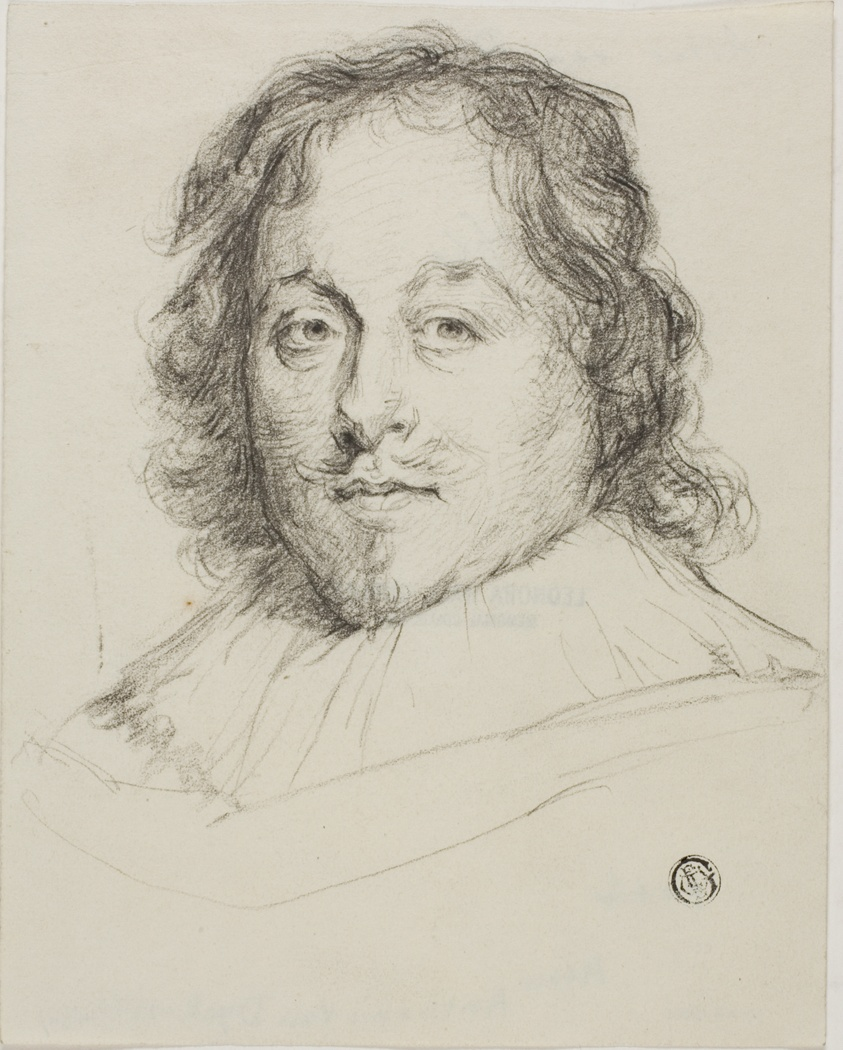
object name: Drawing and Watercolor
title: Constantijn Huygens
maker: After Anthony van Dyck; Flemish, 1599-1641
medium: Charcoal, on ivory wove paper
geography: Flanders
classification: chalk; drawings (visual works); prints and drawing